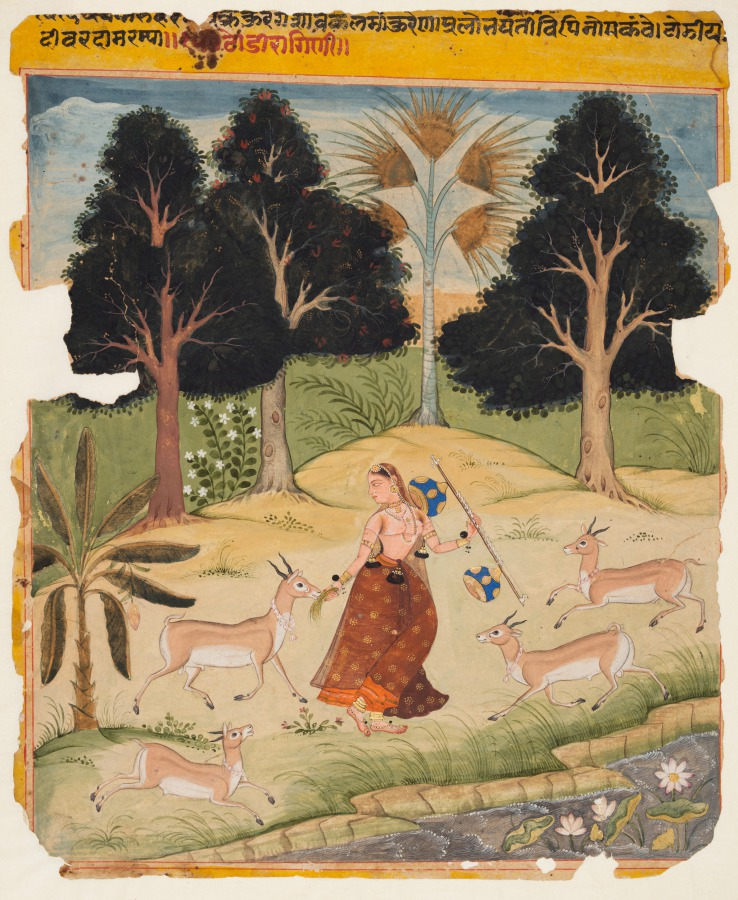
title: Woman Feeding Deer: Todi Ragini, from a Ragamala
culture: Northwestern India, Rajasthan, Rajput Kingdom of Amber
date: c. 1610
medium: gum tempera and gold on paper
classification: Painting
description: The lone woman wears an orange skirt under a sheer brown sari with gold patterns. She offers some grass to one of four deer that approach her with enthusiasm. She holds a blue and gold vina and faces to the viewer’s left. A poetic verse in Sanskrit describing Ragini Todi is inscribed within the upper yellow border.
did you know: Melodies played in the musical mode or key called Todi are performed between 9 AM and 12 PM.